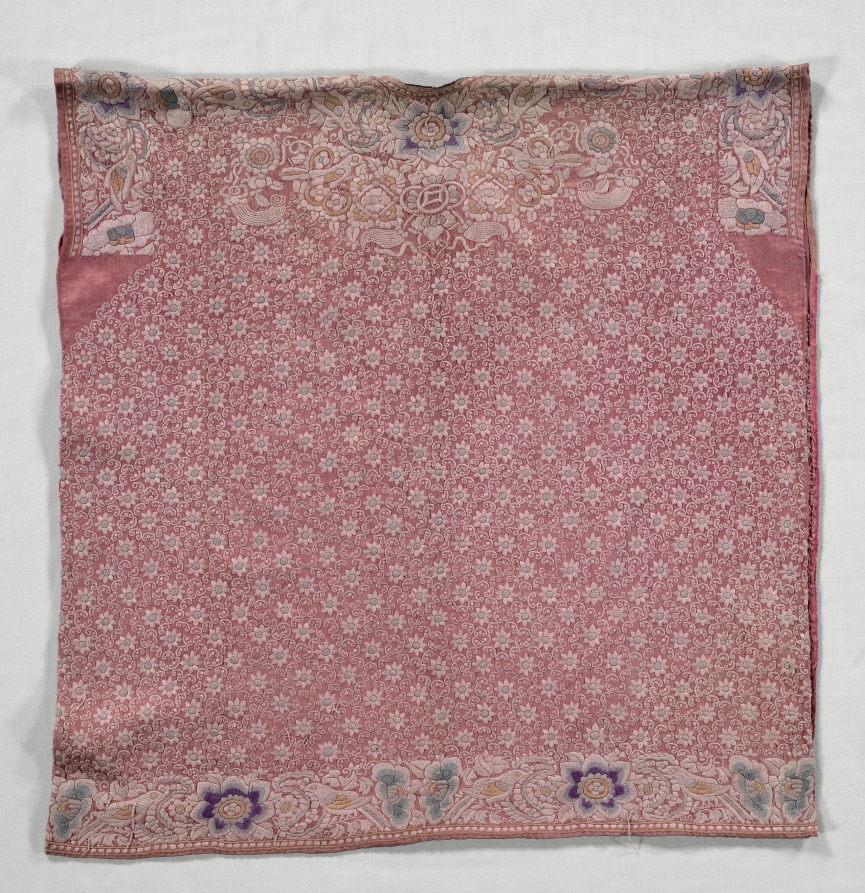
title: Blouse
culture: China, Qing dynasty (1644-1911)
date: 1800s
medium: Silk; embroidered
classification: Garment